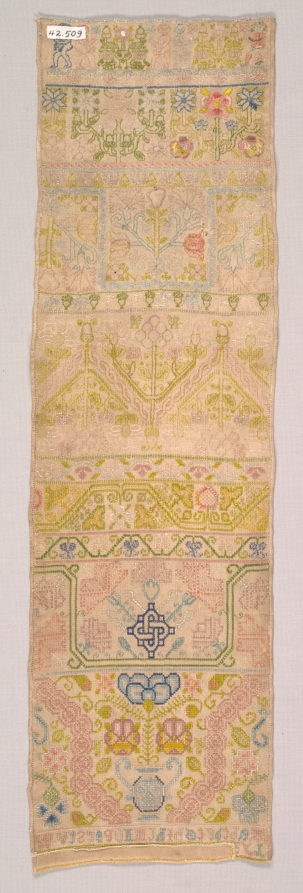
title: Long Sampler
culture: England, 17th century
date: 1600s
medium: embroidery: silk on linen tabby ground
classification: Sampler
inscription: below: "AbCDEFGhIkKMNOPQRStVW/ XYZ."